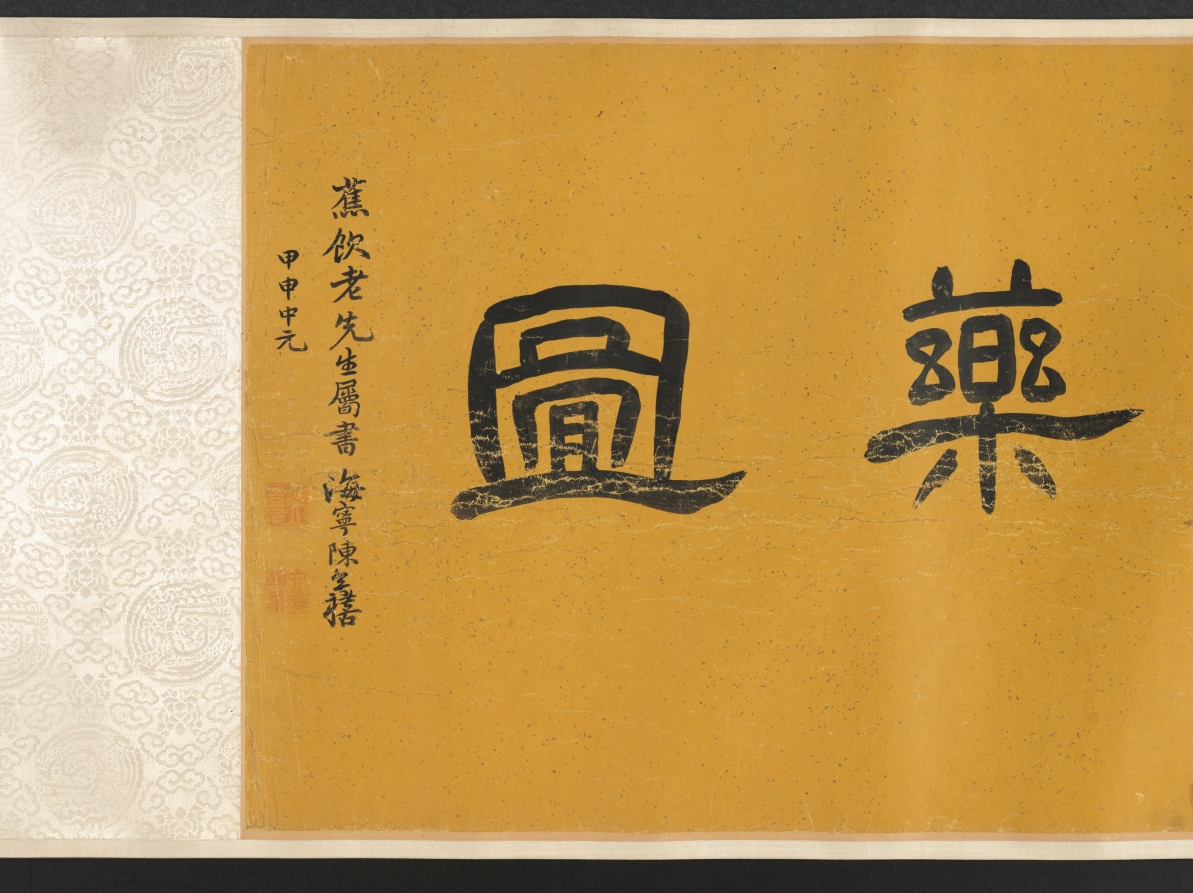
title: Cleansing Medicinal Herbs in the Stream on a Spring Day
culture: China, Qing dynasty (1644-1911)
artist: Yu Zhiding (Chinese, 1647–c. 1716)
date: 1703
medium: Handscroll; ink and color on silk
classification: Painting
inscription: Title by Chen Yixi.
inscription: 姑射仙人冰雪膚，新詩傳唱滿通都。/ 極知遲暮難為別，更展春泉洗藥圖。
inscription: Colophon by Chen Tingjing 陳廷敬 (1639–1712). Colophon by Wang Hongxu 王鴻緒 (1645–1723), dated 1707. Colophon by Song Luo 宋犖 (1634–1714). Colophon by Liu Yan 劉巗. Colophon by Jing Xikui 涇西夔. Colophon by Liu Yan 劉巗. Colophon by Cao Yin 曹寅. Colophon by Wang Shihong 汪士鋐. Colophon by Wang Shidan 王式丹 (1645–1718), dated 1712. Colophon by Shi Shenyi 史申義 (1661–1712), dated 1712. Colophon by Yin Yuqing 殷餘慶, dated 1712.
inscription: Colophon by Chen Shixia 陳時夏, dated 1729.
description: A famous portraitist, Yu Zhiding here depicts the likeness of Shi Shenyi 史申義 (1661–1712), an official and poet. Master Shi, a sickly man, was deeply interested in medicinal science. The opening section of the scroll features a boy washing a fungus in fresh spring water, a basket of medicinal herbs by his side. Other servants carry a fan, a bundle of scrolls, and a cup of tea or hot wine. Master Shi sits in a bamboo grove, surrounded by fields of herbs. Returning swallows, pink peach blossoms, and blooming magnolia indicate spring, whereas the fungus conveys wishes for long life. The spring theme may express the artist’s wish for his friend’s recovery.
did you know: In the pavilion are some of Shi Shenyi’s scholarly accoutrements: a stack of books, an antique zun 尊 (wine vessel), a brush holder, an ink stone, and a small chime.